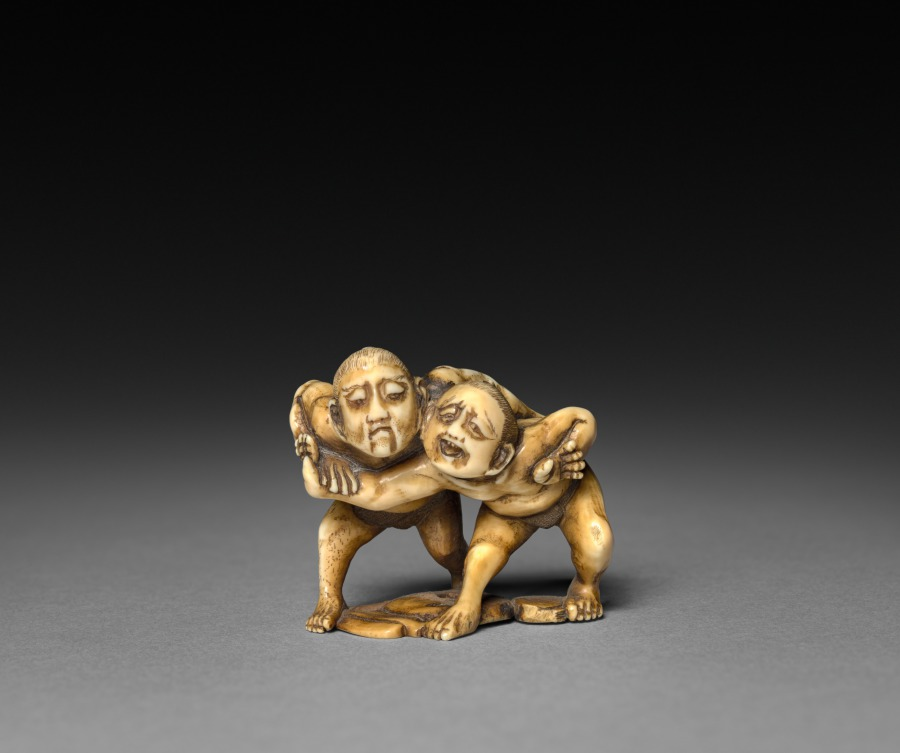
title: Two Wrestlers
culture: Japan, Edo period (1615–1868)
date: early to mid-1800s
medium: ivory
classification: Netsuke